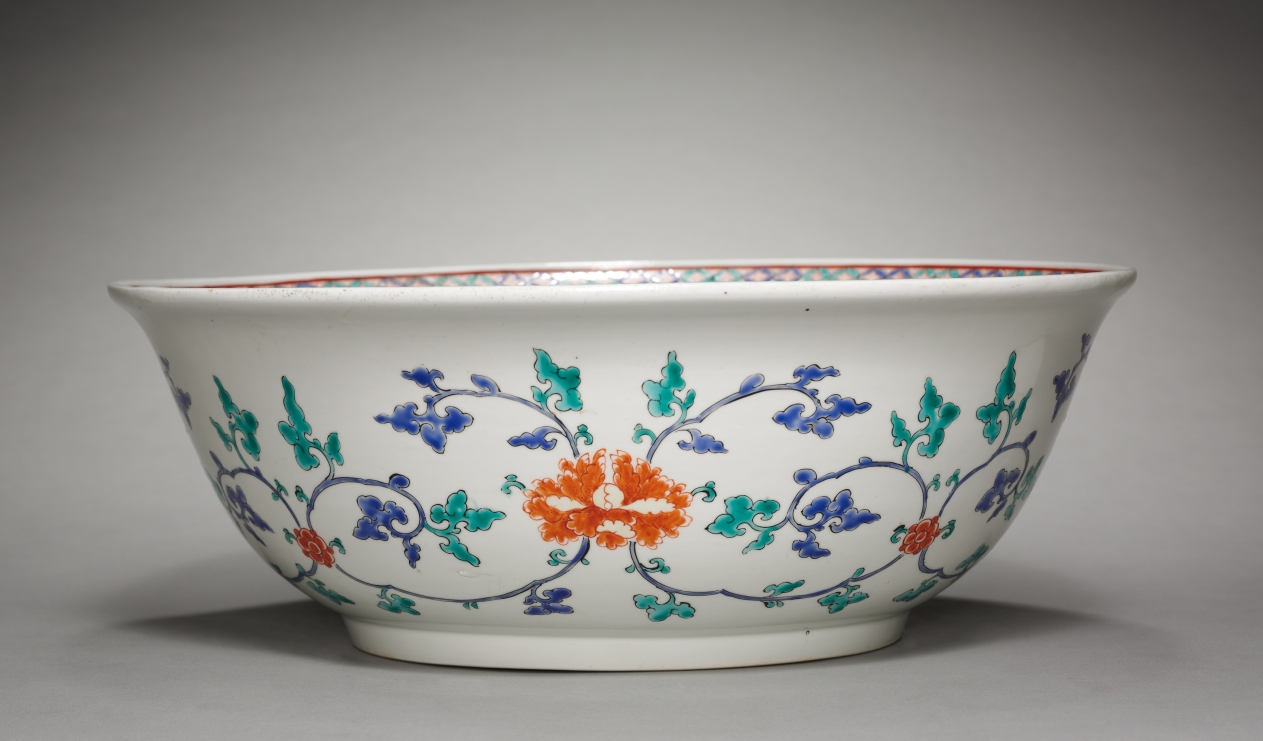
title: Bowl: Kakiemon Ware (1 of 2)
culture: Japan, Edo period (1615–1868)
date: late 1600s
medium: Imari ware porcelain with overglaze enamel and gold decoration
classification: Ceramic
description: The Chinese style of decoration identifies this bowl as a product made for the markets in England, Holland, France, and Germany. Here, kakiemon potters rearranged the Chinese literati motifs of the plum, pine, and bamboo. Such kakiemon ware inspired domestic porcelain production in Europe in the 1700s and 1800s.